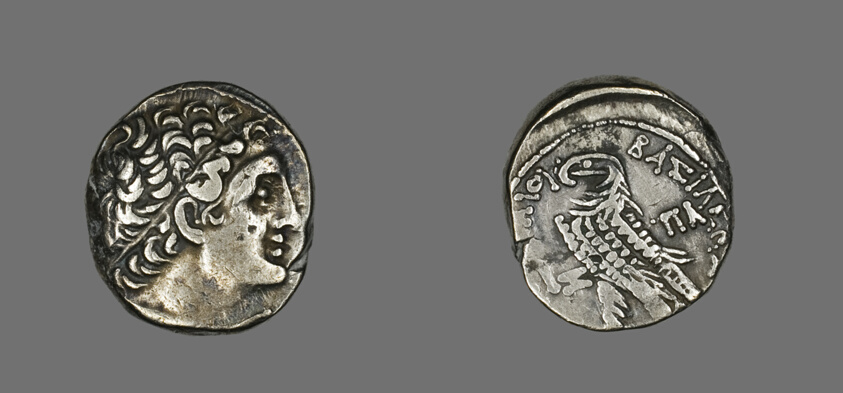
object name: Coin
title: Tetradrachm (Coin) Portraying King Ptolemy of Cyprus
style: ptolemaic, greco-roman (egyptian)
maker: Greek, Ptolemaic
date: 65-64 BCE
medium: Silver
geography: Cyprus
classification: coin; ancient art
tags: king, eagles